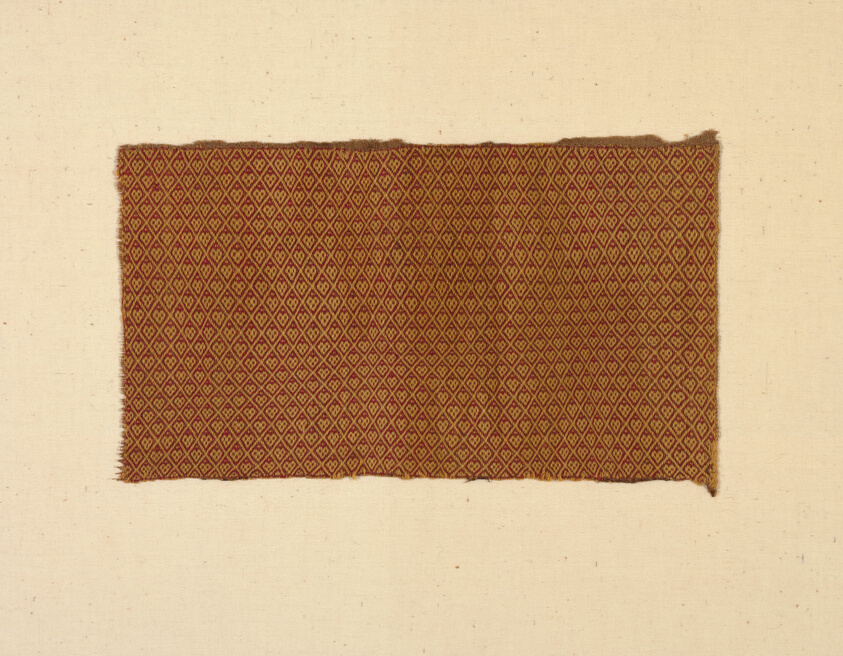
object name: Textile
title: Fragment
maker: Ica (Probably Ica Valley, south coast, Peru)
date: A.D. 1000/1532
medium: Cotton and wool (camelid), two-color complementary weft diamond twill weave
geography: Peru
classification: textile; weaving